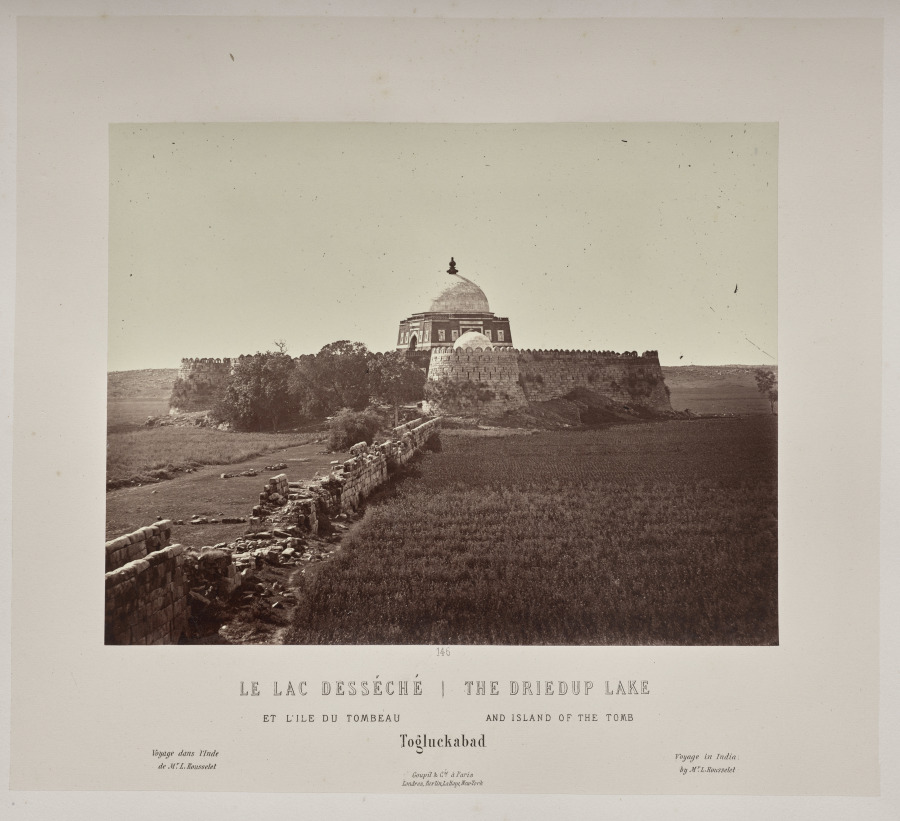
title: The Driedup Lake and Island of the Tomb, Togluckabad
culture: France, 19th century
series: India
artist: Louis-Théophile Marie Rousselet (French, 1845–1929)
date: 1865–68, published 1869–70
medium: Albumen print from glass plate negative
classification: Photograph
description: Concerned that his drawings did not do justice to the splendor of India’s monuments, Rousselet learned photography in India that year, a remarkable accomplishment. He proved to be a talented photographer with a sophisticated sense of composition. The scenes in this volume sweep across sites of Sultanate, Rajput, and Mughal power in northern India, from the sacred Hindu city of Varanasi on the Ganges River to Alwar in Rajasthan. Also included are several scenes of industry and portraits of Indian rulers.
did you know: Louis Rousselet described himself as a “scientific traveler” when he went to India alone at age 18 in 1863 and stayed into 1868.